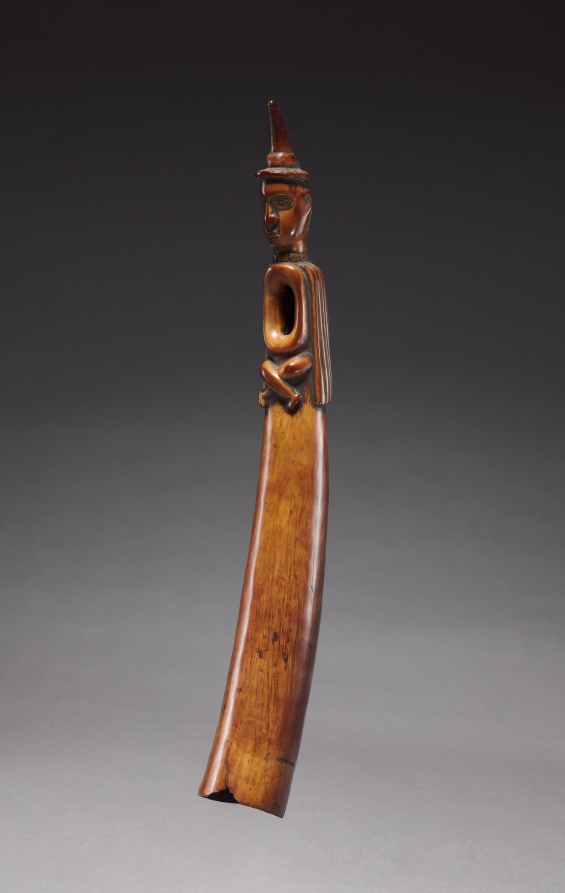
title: Oliphant (Side-Blown Trumpet)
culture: Africa, Central Africa, Democratic Republic of Congo (most likely), Cabinda, or Republic of the Congo, probably Yombe-style maker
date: late 1800s–early 1900s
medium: Ivory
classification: Musical Instrument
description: Side-blown trumpets were used on various occasions, and ivory examples seem to have been reserved for more solemn circumstances, such as funerals. As the mouthpiece is located on the inner curve, the person who played this instrument held it horizontally. A seated male Yombe ruler wearing a shell necklace and a European-style cloak and hat is carved on top. His blended dress shows how Yombe people (a Kongo sub-group) selectively adopted elements of foreign dress to wear with their own fashions.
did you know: Kongo Kingdom rulers sent ornately carved large side-blown trumpets to Europe as diplomatic gifts during the sixteenth century.